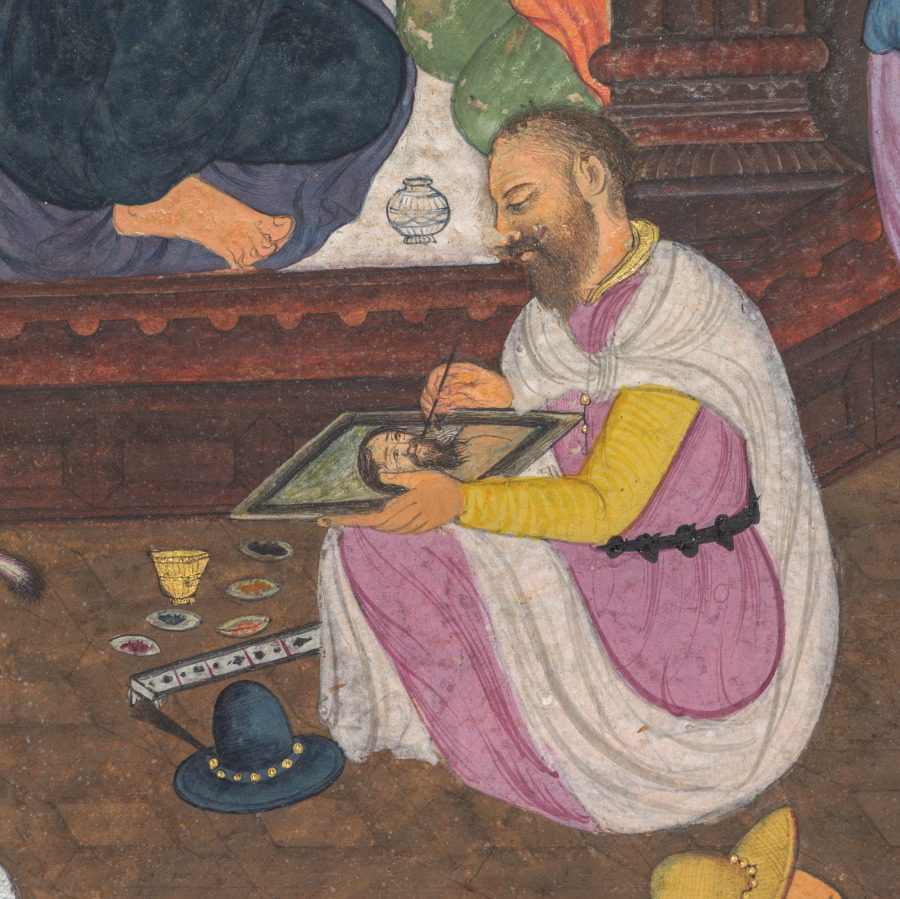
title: Jesus being portrayed by King Abgar’s painter (folio 143 recto), from a Mirror of Holiness (Mir’at al-quds) of Father Jerome Xavier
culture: Mughal India, Allahabad, made for Prince Salim (1569–1627)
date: 1602–4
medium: Gum tempera, ink, color, and gold on paper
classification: Manuscript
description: Jesus sits under a golden lamp with a cloth in his hand, while an artist sits before him, struggling to paint his portrait. The artist had been sent by his king, Abgar of Edessa, who was ill and believed the portrait would cure him. Jesus pitied the artist and pressed his face to the cloth to create a perfect impression. The miraculous cloth became known as the Mandylion and was venerated by Christians as a relic of Christ. The similarity between the names Abgar and Akbar suggests that Father Jerome included this noncanonical story in his biography of Jesus to resonate with and inspire the Mughal emperor.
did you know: Artist’s pigments are arranged in shells next to the brass cup for water.